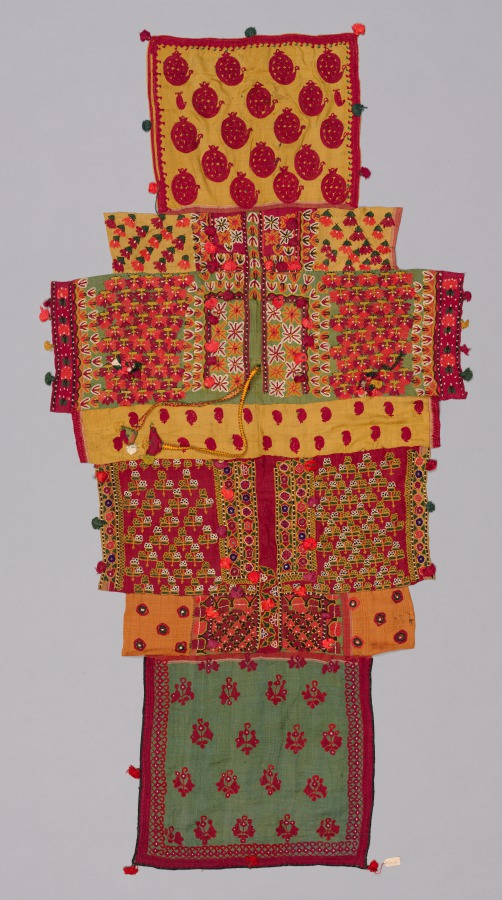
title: Fragments sewn together to form Cover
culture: Western India, Gujarat, Kachchh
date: 1800s–early 1900s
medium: silk thread on silk ground, embroidery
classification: Embroidery